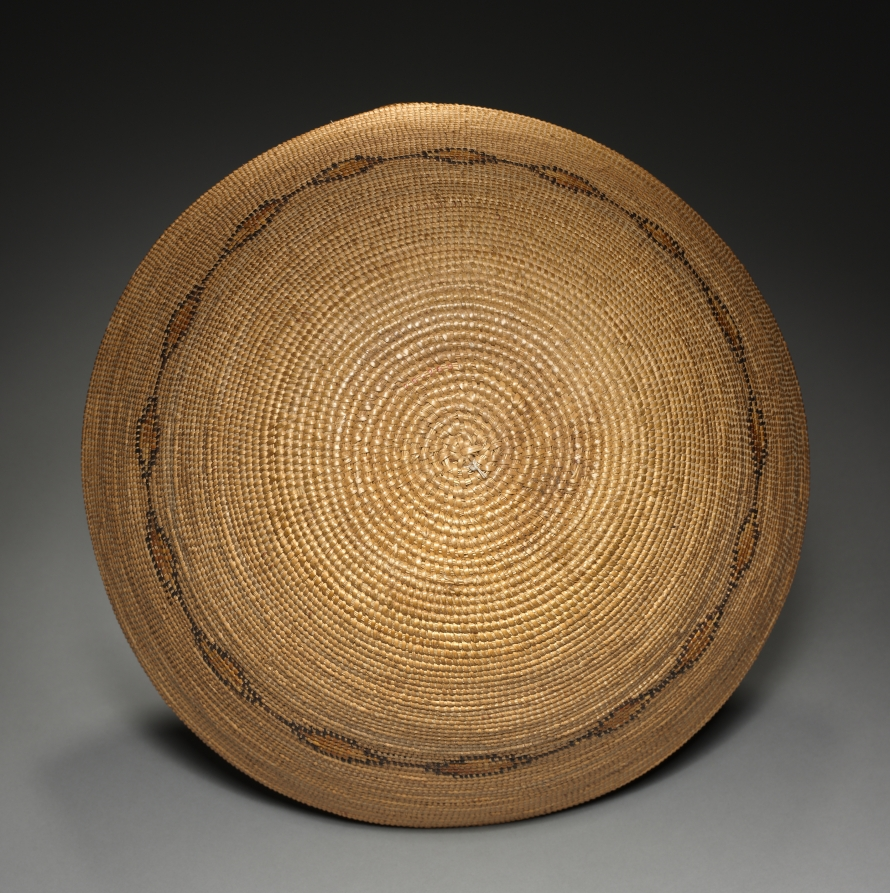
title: Food / Carrying Bowl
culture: California, Southern, Gabrielino (San Gabriel, Mission, or Tongva), 20th century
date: before 1929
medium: coiled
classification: Basketry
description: CMA Bulletin, December 1930